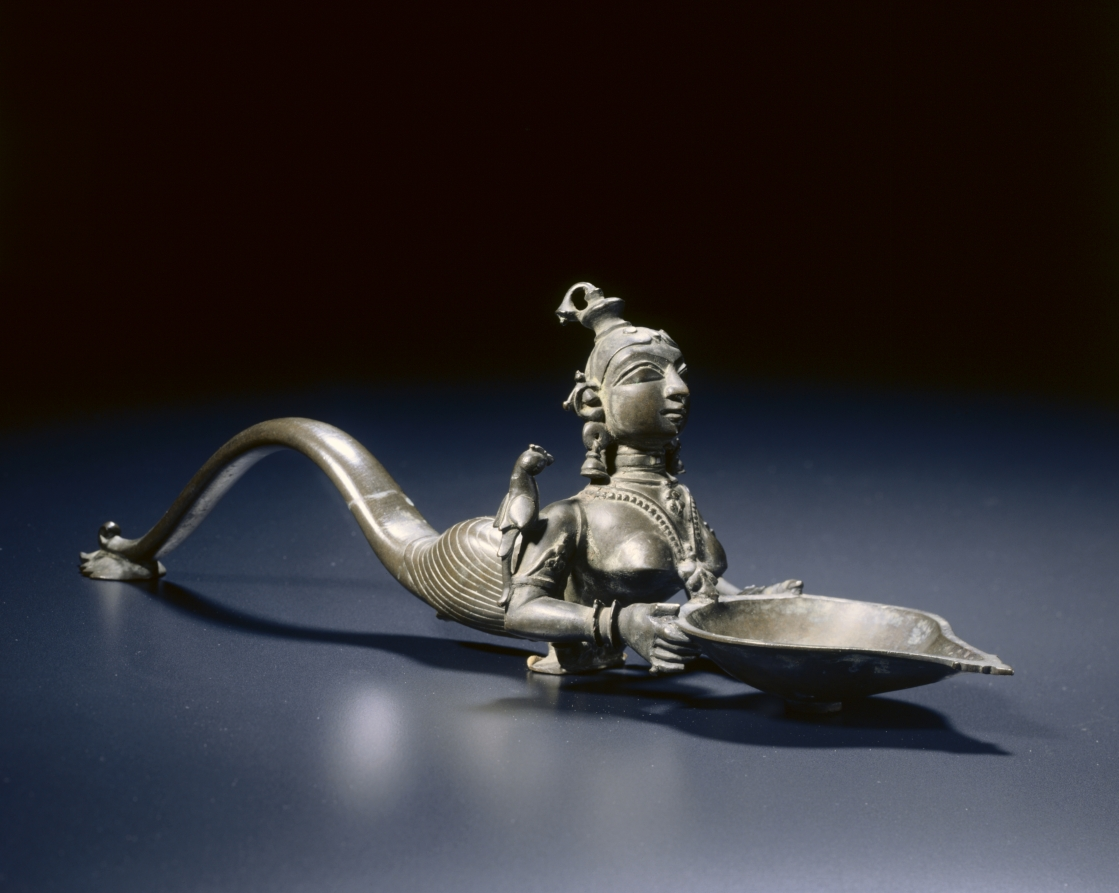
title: Votive Lamp (Deepa Lakshmi)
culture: South India, Chingleput district (Madras), 18th-19th Century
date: 1700s-1800s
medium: bronze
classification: Sculpture